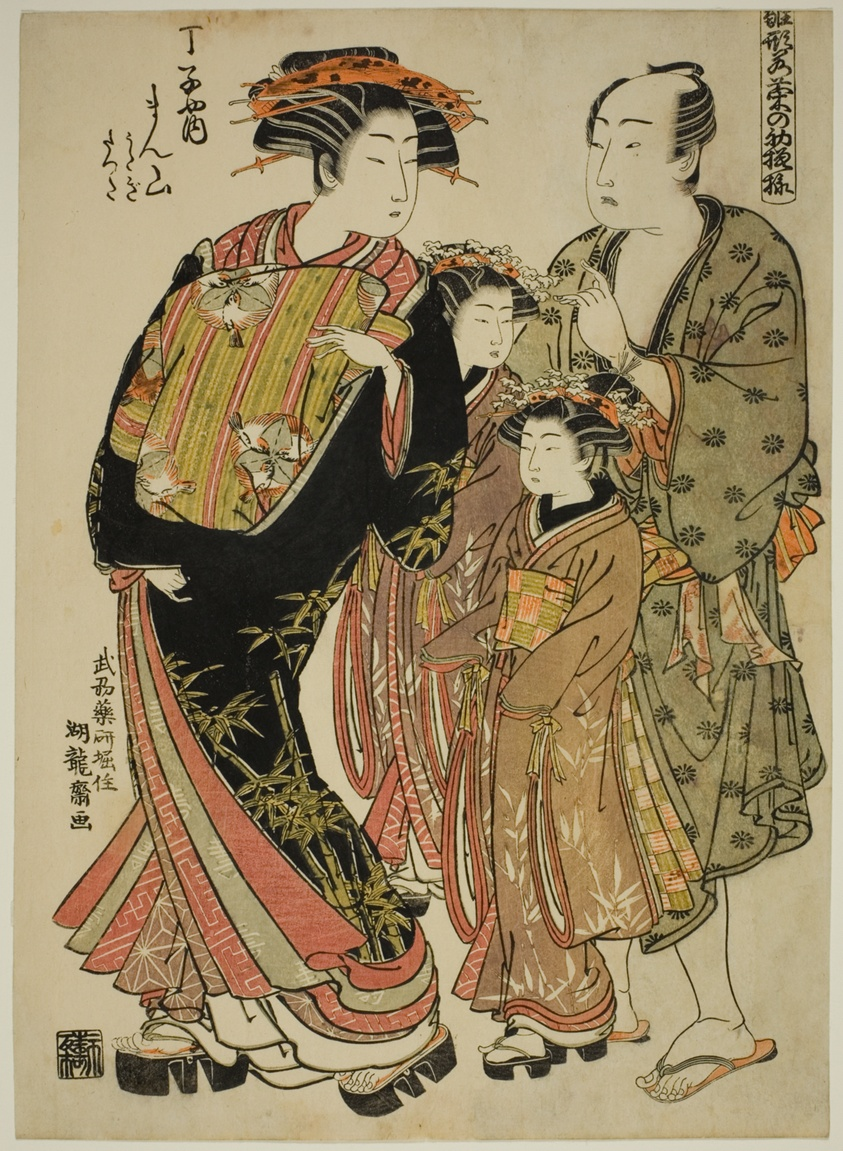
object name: Print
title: Manzan of the Chojiya, from the series "Models for Fashion: New Designs as Fresh as Young Leaves (Hinagata wakana no hatsu moyo)"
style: Japanese (culture or style)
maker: Isoda Koryusai (Japanese, 1735-1790)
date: c. 1778/80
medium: Color woodblock print; oban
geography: Japan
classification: woodblock print; print; asian art